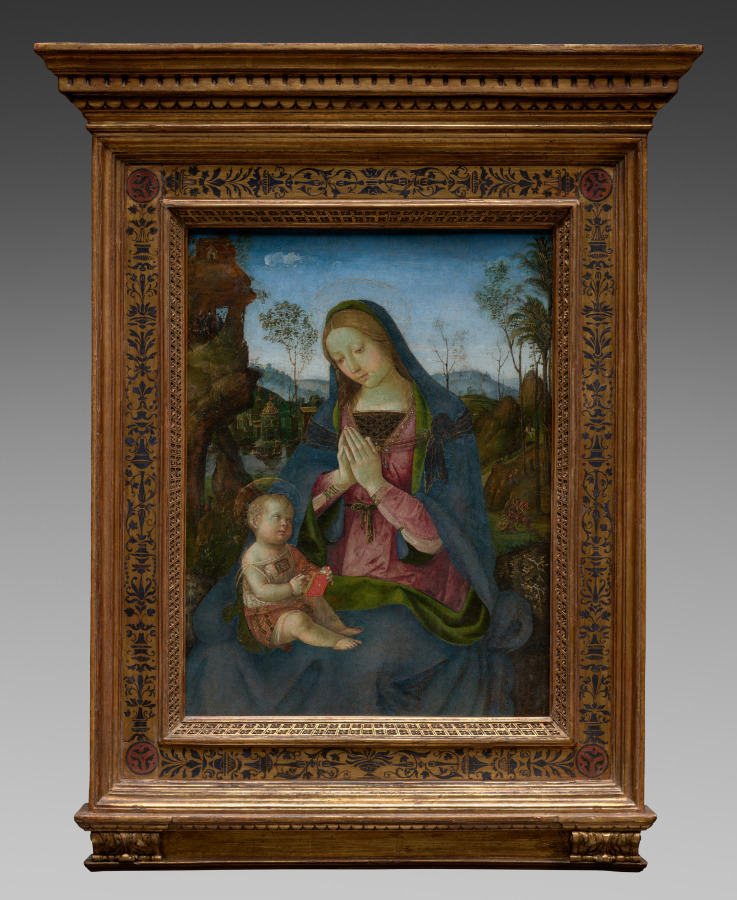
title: Virgin and Child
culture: Italy, late 15th Century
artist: Pintoricchio (Italian, c. 1454–1513)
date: c. 1490–1500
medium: tempera and oil on wood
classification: Painting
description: Bernardino di Betto, called Pinturicchio, is said to have acquired his nickname ("little painter") because of his small stature, and used it to sign some of his paintings. Born in Perugia, the provincial capital of Umbria, he trained under local artists, eventually becoming a paid assistant of the painter Perugino. He is known to have assisted Perugino on his frescoes in the Sistine Chapel and eventually established his own reputation as a respected artist. Many of his commissions were for churches and wealthy families in Umbria and elsewhere. Though the source of this painting is unknown, it was likely produced for a home or private chapel.